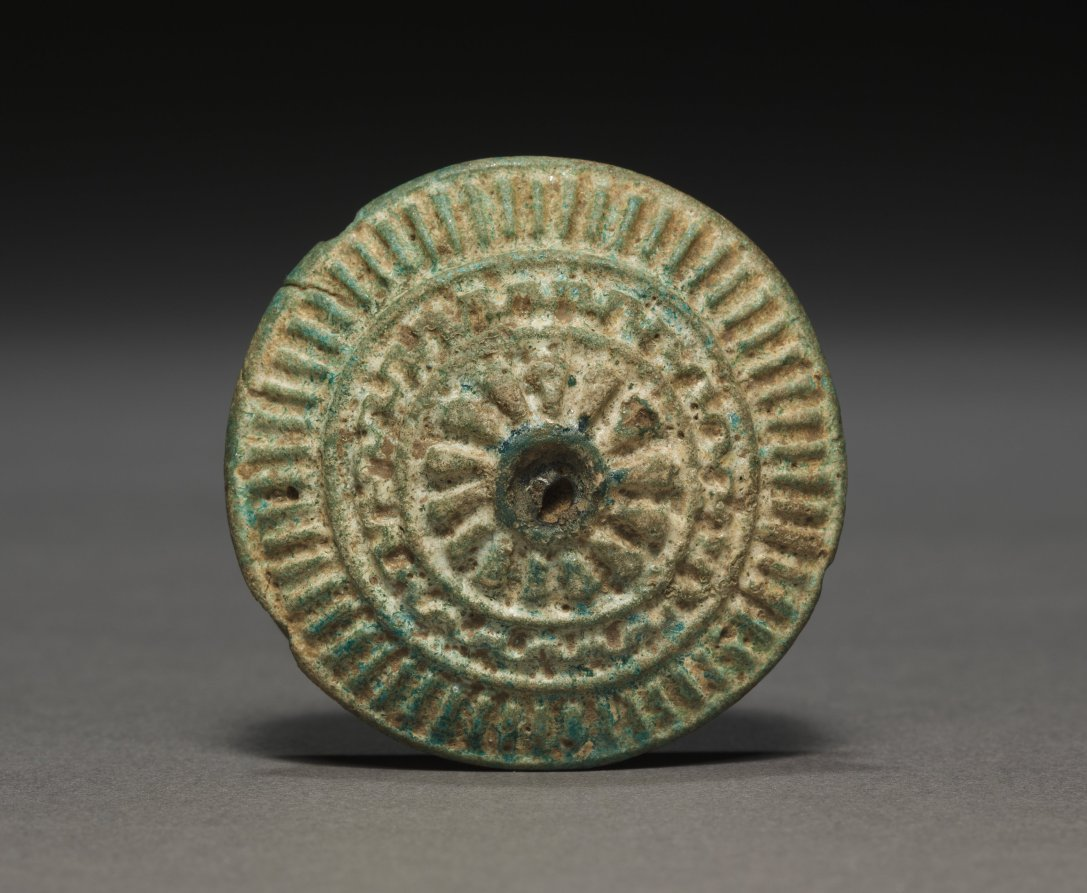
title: Ear Stud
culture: Egypt, New Kingdom (1540–1069 BCE), Dynasty 18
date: 1540–1069 BCE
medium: turquoise faience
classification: Amulets